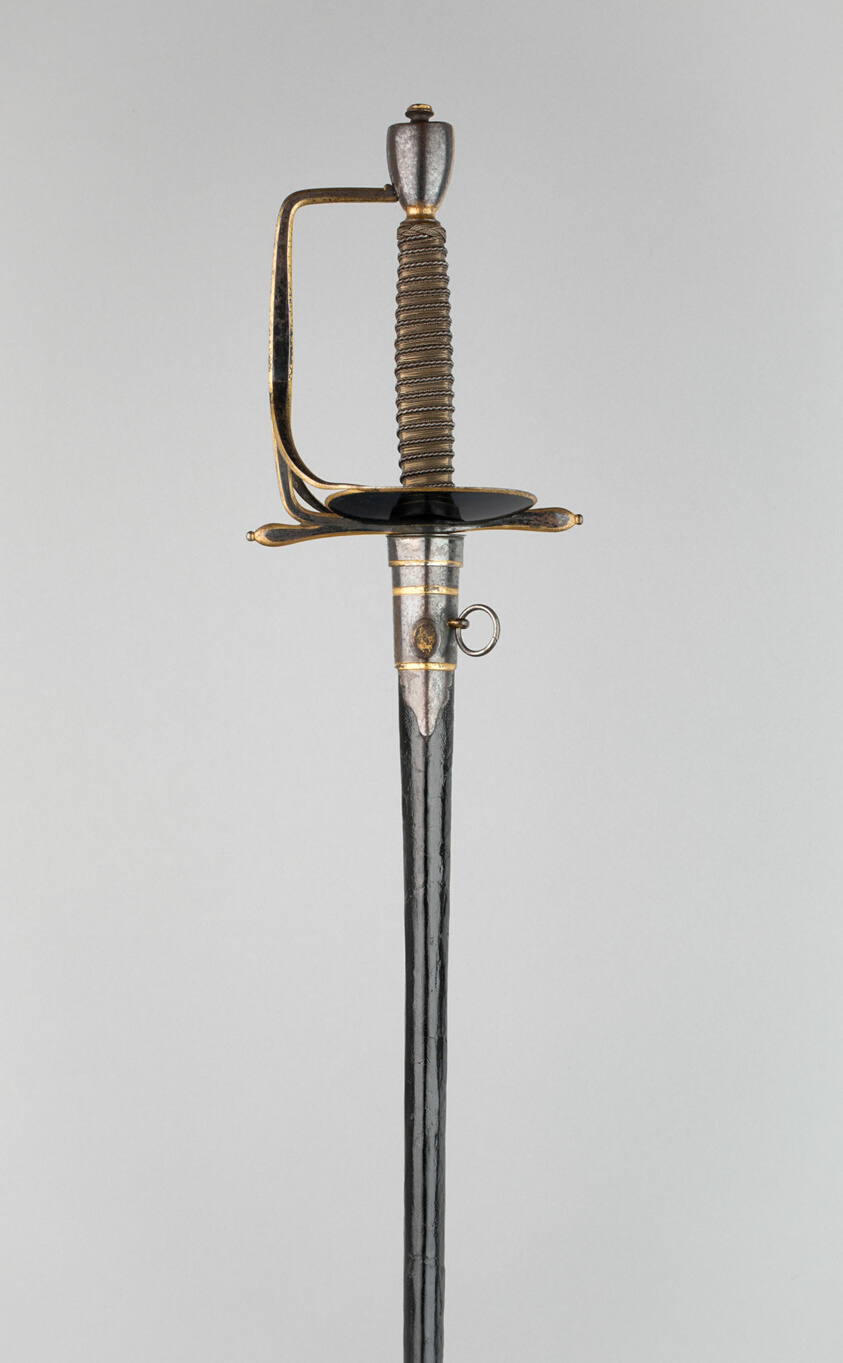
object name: Arms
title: Military Smallsword and Scabbard of a Member of the British Royal Family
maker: Cutlers: John Highlord Bland (English, died 1791); and Robert Foster (English, 1758-1798), London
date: 1787/91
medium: Steel, silver, brass, gilding, wood, and lacquered snakeskin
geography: England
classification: edged weapon-sword; arms and armor; arms